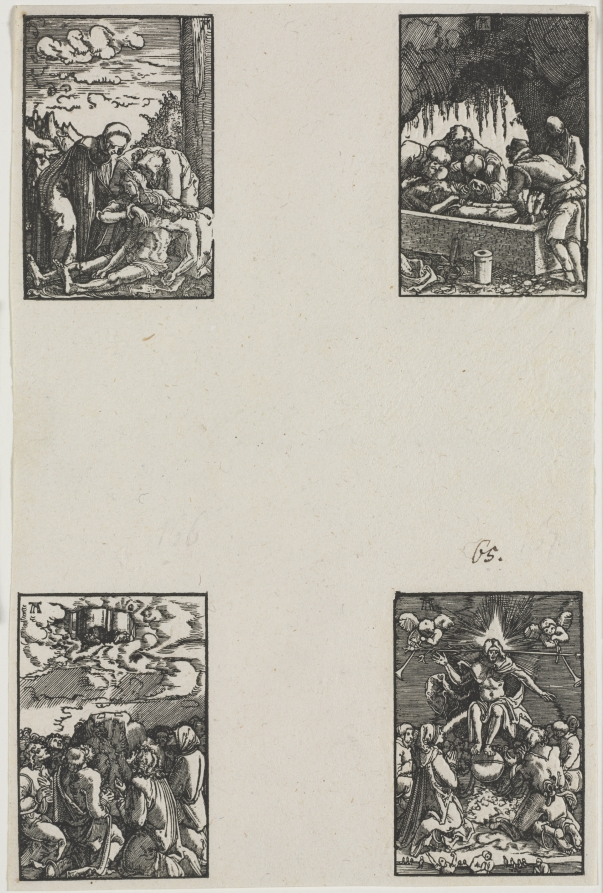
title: The Fall and Redemption of Man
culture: Germany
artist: Albrecht Altdorfer (German, c. 1480–1538)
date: c. 1515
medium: woodcut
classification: Print